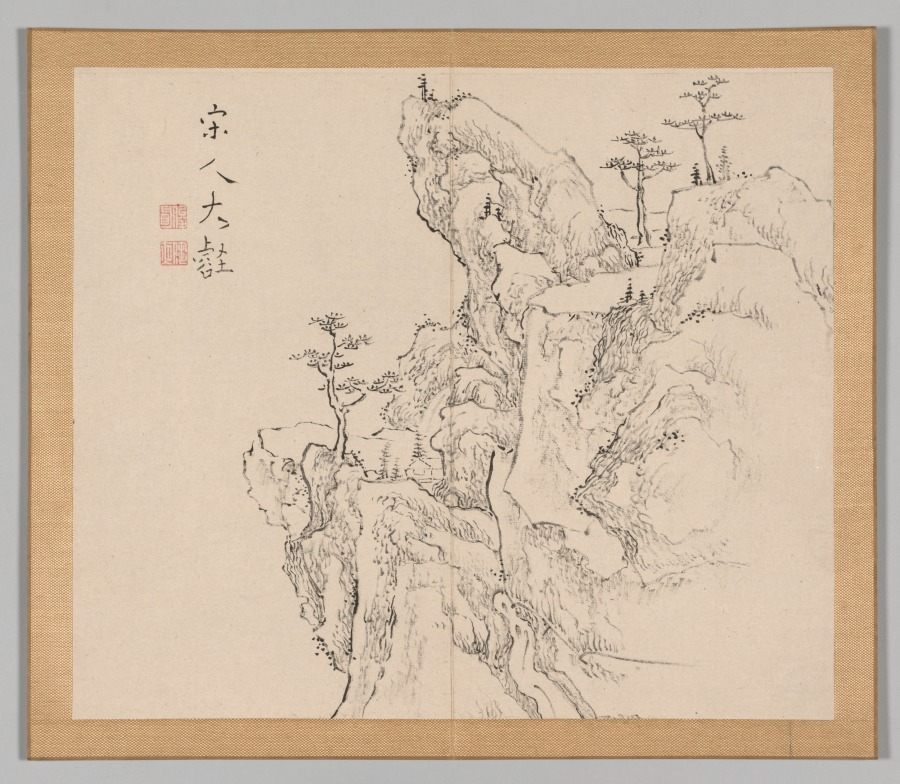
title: Reverberations of Taiga, Volume 2 (leaf 1)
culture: Japan, Edo period (1615–1868)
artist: Aoki Shukuya (Japanese, d. 1802)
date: mid- to late 1700s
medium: double-leaf from a pair of albums; ink and light color on paper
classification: Portfolio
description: Traditionally, young painters in Japan began their studies with an established master-painter. The master's compositions invariably became models that the apprentice copied to learn various ink and brush techniques. Shukuya was a pupil of the famous Kyoto artist Ikeno Taiga, whose style is reflected in these sketches of rocks, trees, and mountains.